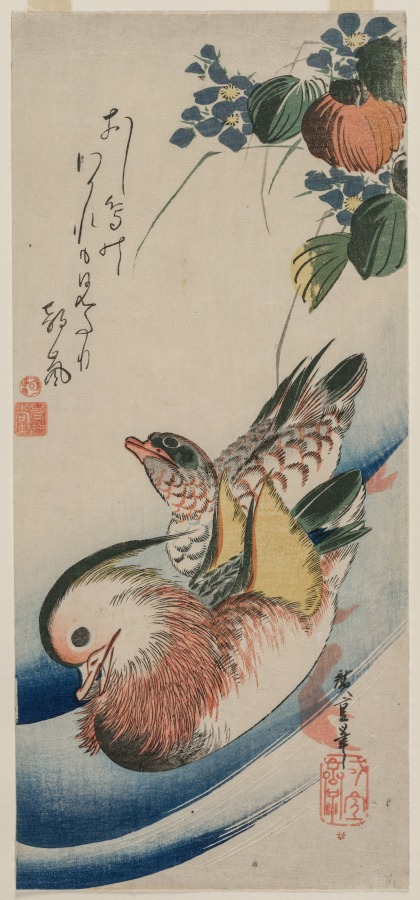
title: Mandarin Ducks and Flowering Plants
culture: Japan, Edo period (1615–1868)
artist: Utagawa Hiroshige (Japanese, 1797–1858)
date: early or mid-1830s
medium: color woodblock print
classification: Print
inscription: Signature: Hiroshige hitsu. Artist Seal: Ichiryusai. Publisher: Wakasaya Yoichi (Jakurindo). Censorship Seal: kiwame.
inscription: Collector's seal: Vever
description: In Asian painting, ducks are usually shown in pairs because a male and female mate for life. They symbolize fidelity and tranquility. The presence of another duck is suggested here by the gesture of the bird's head. Notice the variety of brushstrokes and ink tones used to depict the duck's plumage. The bird and flower genre is a popular theme in the paintings and prints of the Kelvin Smith Collection. Kachoga, or bird and flower pictures, became popular among collectors in Japan during the 19th century, due in large part to Hiroshige. Although better known for his landscape prints, Hiroshige made several exceptional prints of birds, plants, and animals that reveal his keen observation of nature.